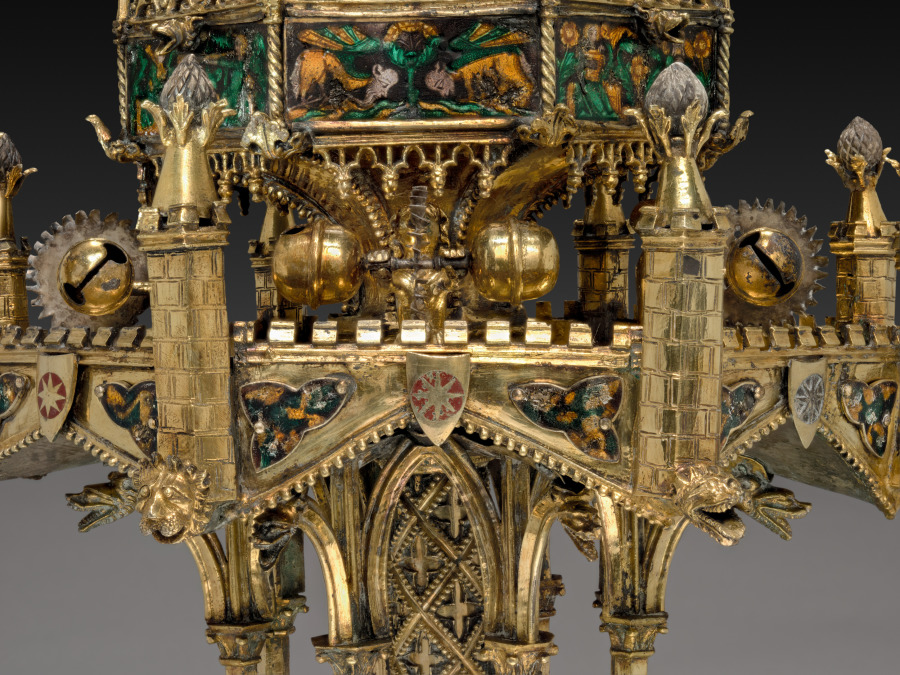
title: Table Fountain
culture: France, Paris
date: c. 1320–40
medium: gilt-silver and translucent enamels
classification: Metalwork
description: Conceptually and stylistically, this object is beyond all else a piece of Gothic architecture in miniature with vaults, pinnacles, columns, and traceried arches. Though the artist who created it is unknown, he was unquestionably inspired by the great Gothic buildings of his time. The table fountain is a three-tiered assembly combining cast elements with bent sheets of gilt-silver. To these have been attached a series of enamel plaques representing grotesque figures, some of which play musical instruments. Water wheels and bells were added to capture motion and sound. The rich detail, precious materials, and involved ornamentation of this deluxe object suggest it would have been expensive to produce and highly treasured by its original owner, someone of high status, and would have been deployed as an object of spectacle. This is the most complete example of its type known to survive from the Middle Ages. Medieval inventories reveal that small fountains like this, often taking various forms, and generally made from precious metals, once existed in large numbers, thus making the Cleveland table fountain an extremely rare object.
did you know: This fountain with its minute architectural details and finely made enamel plaques displayed the wealth and refinement of the owner as it entertained his guests. Imagine hearing the ringing of the tiny bells when this fountain was in use.